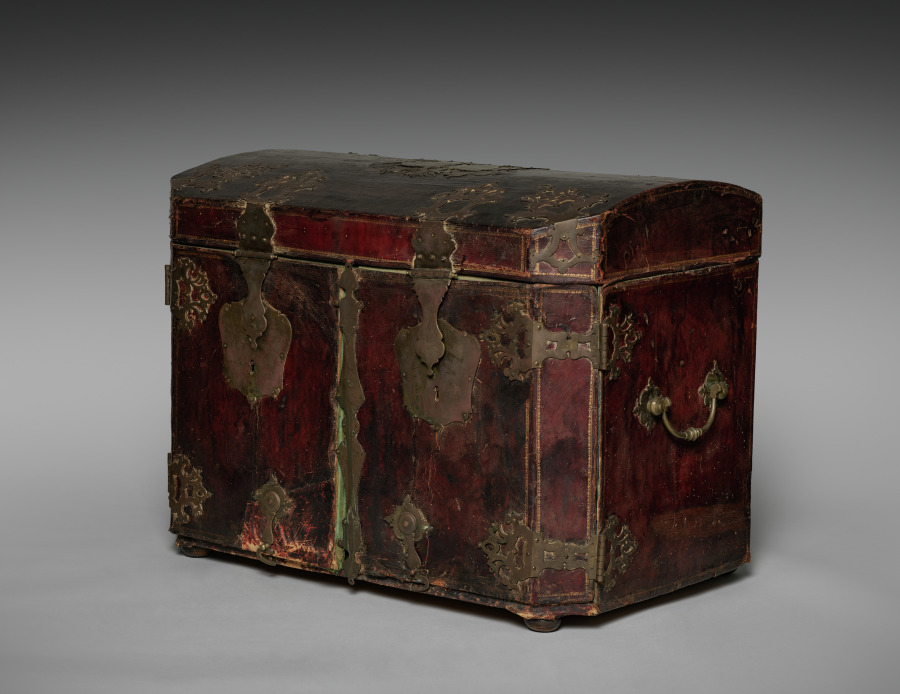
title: Chest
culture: Italy, Venice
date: 1700s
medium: leather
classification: Miscellaneous